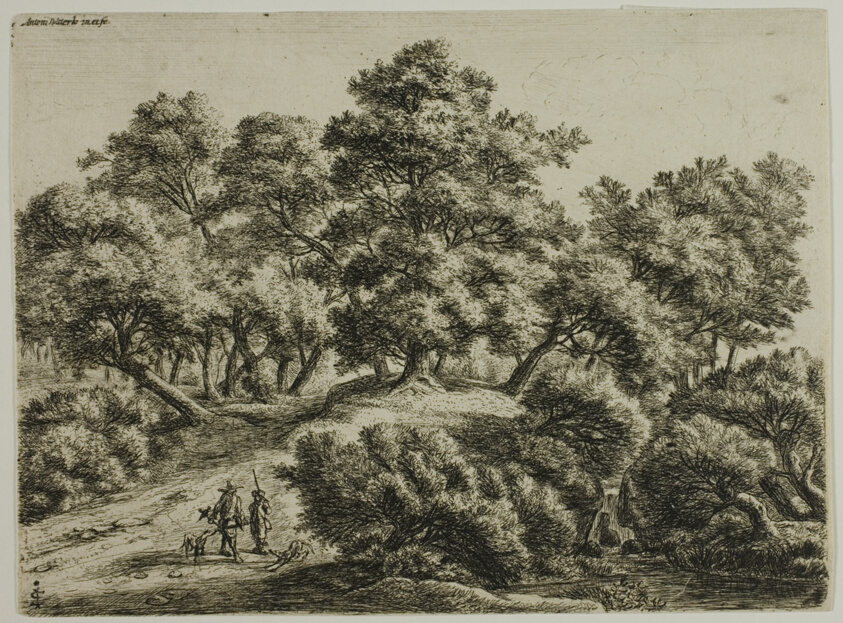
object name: Print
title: The Falconer and the Hunter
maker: Anthonie Waterloo (Dutch, c. 1610-1690)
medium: Etching on paper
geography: Holland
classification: etching; print; prints and drawing